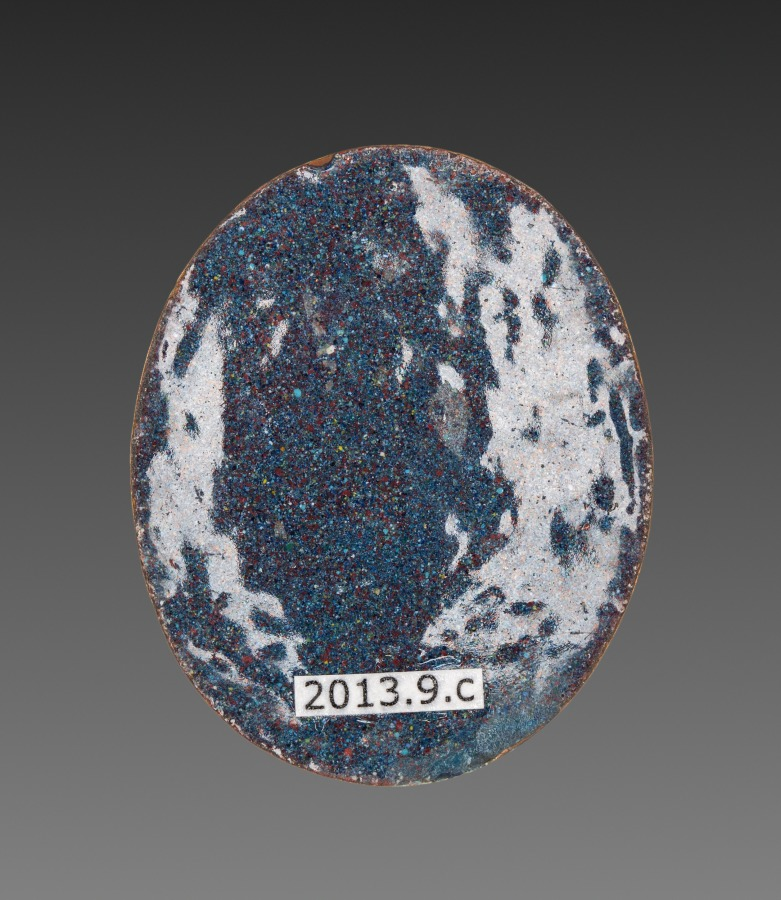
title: Locket Panel (3 of 4)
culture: France, 19th century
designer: Alexis Falize (French, 1811–1898)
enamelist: Antoine Tard (French, active 1860–1889)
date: 1800s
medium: gold and cloisonné enamel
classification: Jewelry